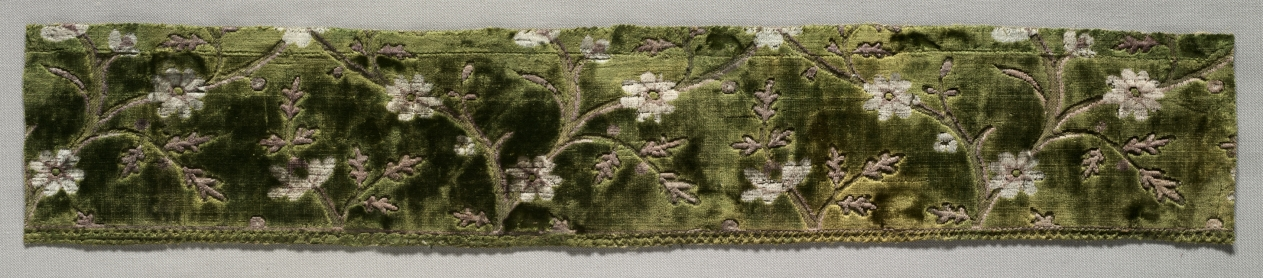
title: Fragment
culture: Iran, 17th century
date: 1600s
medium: velvet (cut, voided, and brocaded); silk and gilded silver strips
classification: Velvet